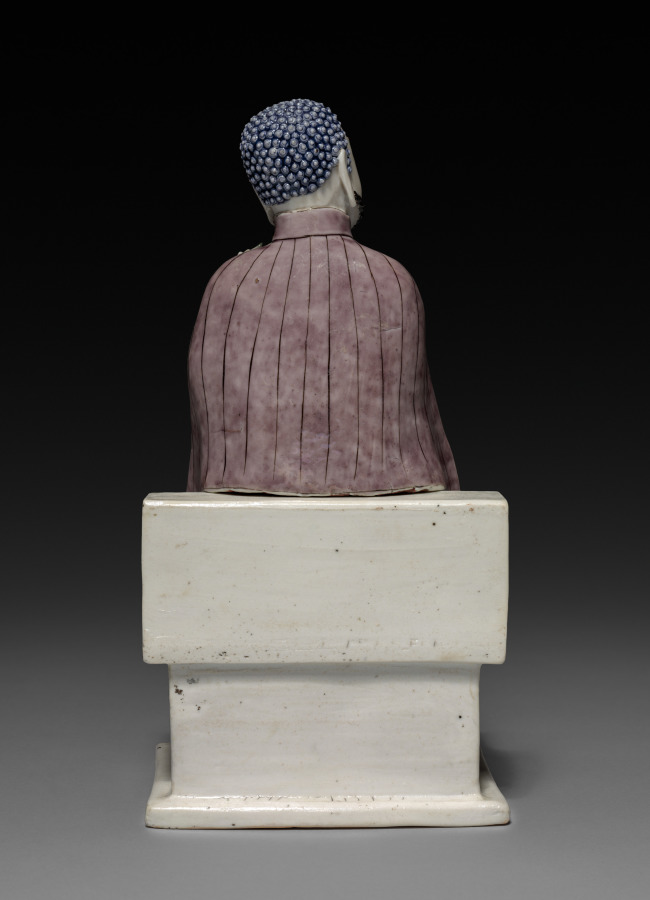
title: Lohan (Arhat) Holding a Fu Dog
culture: China, Jiangxi province, Jingdezhen kilns, Qing dynasty (1644-1911), Kangxi reign (1662-1722)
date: 1662–1722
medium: porcelain with famille verte overglaze enamel decoration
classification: Ceramic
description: Lohan are disciples of Buddha with supernatural powers and eccentric behaviors. This lohan is holding the fu-dog, symbolizing good luck, while its mate is holding the peach of longevity (shoutao). With carefree smiles and playful gestures, these two figures embody a humorous attitude and a detachment from worldly affairs. This pair of porcelain figures was perhaps part of a house altar set or a decorative item in a household.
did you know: This lohan and its pair embody a humorous attitude and playful behavior, indifference to danger and miracles, and hence a detachment from worldly affairs.